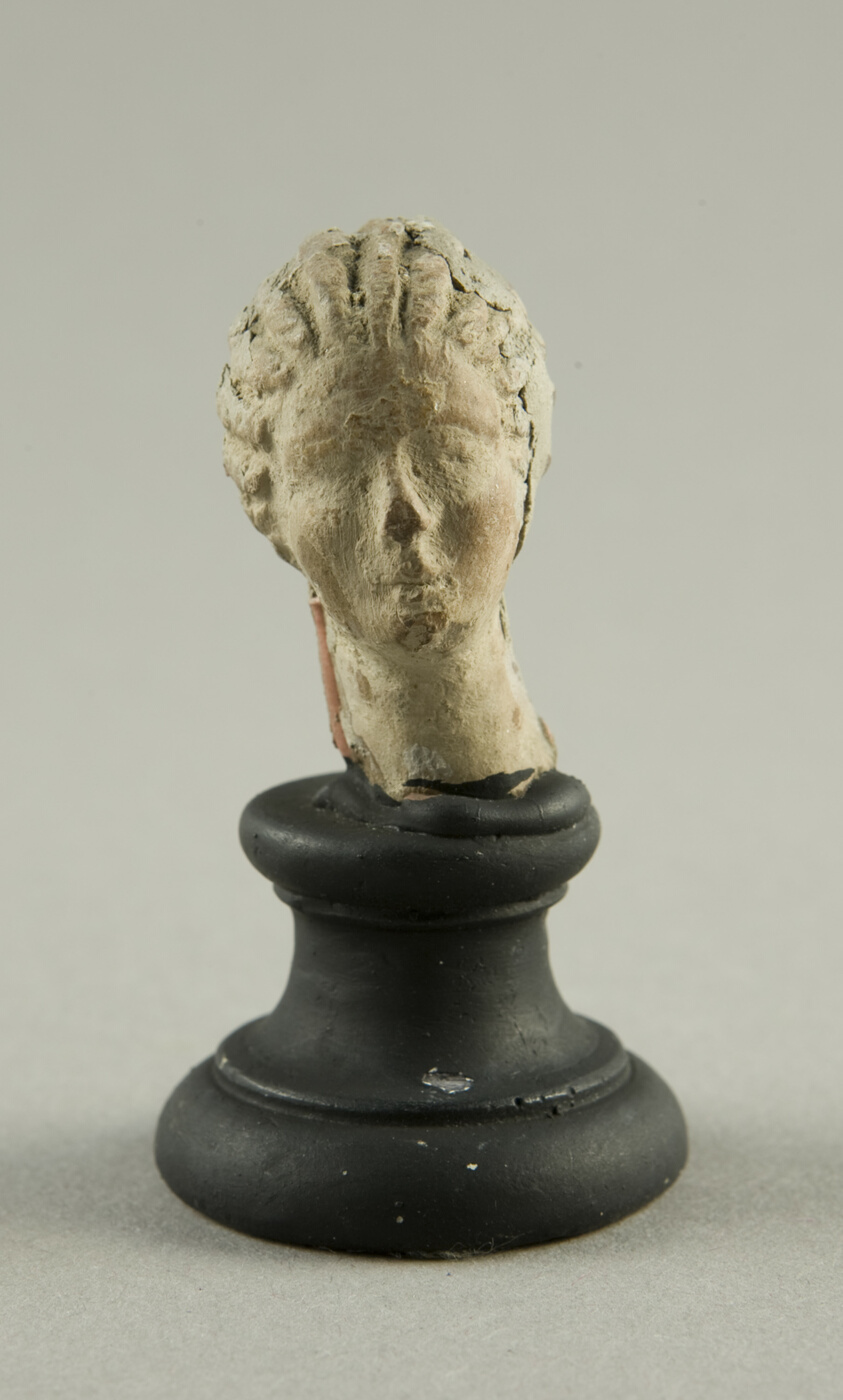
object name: Sculpture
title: Head of a Woman with Melon Hairdo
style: greek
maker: Greek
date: 4th-3rd century BCE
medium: terracotta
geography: Greece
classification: earthenware; ceramics; sculpture; ancient art